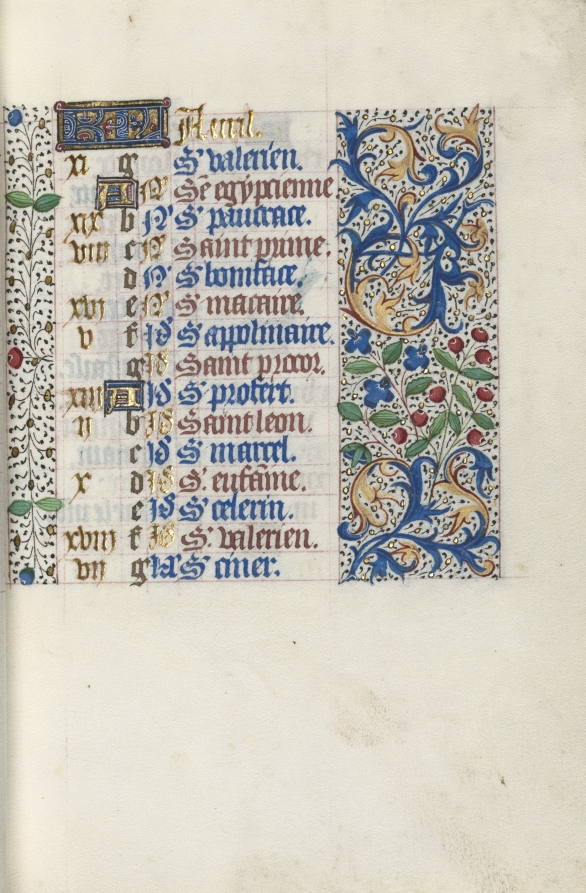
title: Book of Hours (Use of Rouen): fol. 4r, Calendar Page for April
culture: France, Rouen, 15th century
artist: Master of the Geneva Latini (French, active Rouen, 1460–80)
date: c. 1470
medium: ink, tempera, and gold on vellum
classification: Bound Volume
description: In the late 1400s and early 1500s Rouen was an established and important center of book production. The city’s cathedral had a wealthy chapter that spent large sums of money to commission books and to maintain its extensive library. The stationers and booksellers would have likely been concentrated in or near the cathedral precinct. This artist, named after a manuscript now in Geneva, was Rouen’s principal illuminator during the second half of the 1400s.